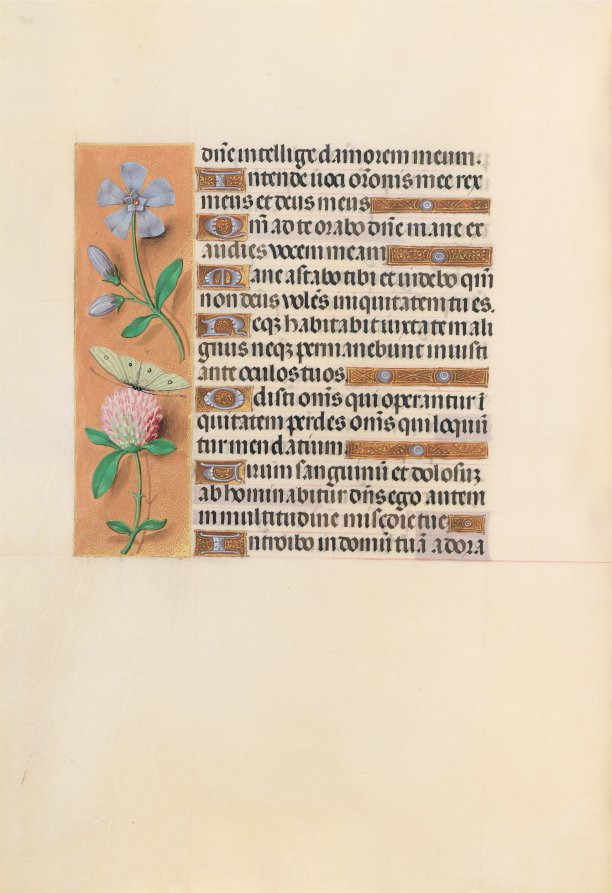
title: Hours of Queen Isabella the Catholic, Queen of Spain: Fol. 227v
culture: Flanders, Ghent and Bruges, late 15th century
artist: Master of the First Prayerbook of Maximillian (Flemish, c. 1444–1519)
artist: and Associates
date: c. 1500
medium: ink, tempera, and gold on vellum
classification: Bound Volume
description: This manuscript was illuminated by a circle of at least five highly organized manuscript painters active in the Flemish cities of Ghent and Bruges. The principal illuminator was Alexander Bening, who painted the majority of the book's miniatures. Manuscripts produced by this circle of artists are renowned for the decoration of their borders, which typically feature a rich variety of realistically-painted flowers, birds, and butterflies. This prayer book, called a book of hours, was intended not for a cleric, but for the private devotions of a lay person-in this case, Isabella the Catholic, Queen of Spain (1451-1504). Isabella's coat of arms embellishes the book's frontispiece. It is unlikely that the book was commissioned by the Queen herself; rather, she probably received it as a diplomatic gift from someone courting her patronage, perhaps Cardinal Francisco Jimenez de Cisneros. A Franciscan friar, Jimenez was dependent upon Isabella for his advancement, first to the post of Queen's confessor in 1492, and then to Archbishop of Toledo in 1495.